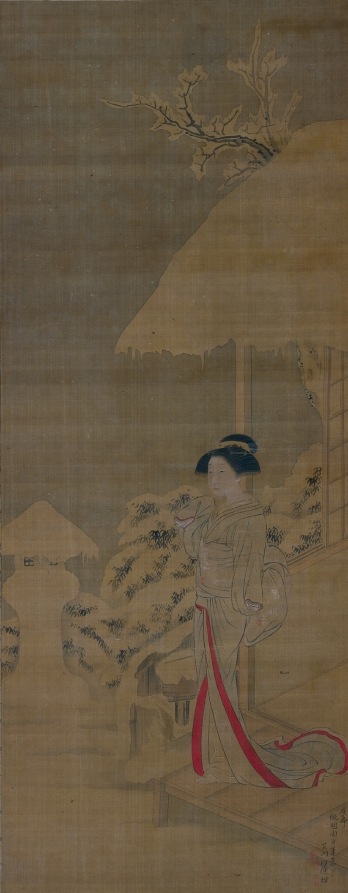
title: Beauty (Bijin) in the Snow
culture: Japan, Edo period (1615–1868)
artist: Shiba Kōkan (Japanese, 1747–1818)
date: c. 1775–1818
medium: hanging scroll; ink and color on silk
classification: Painting